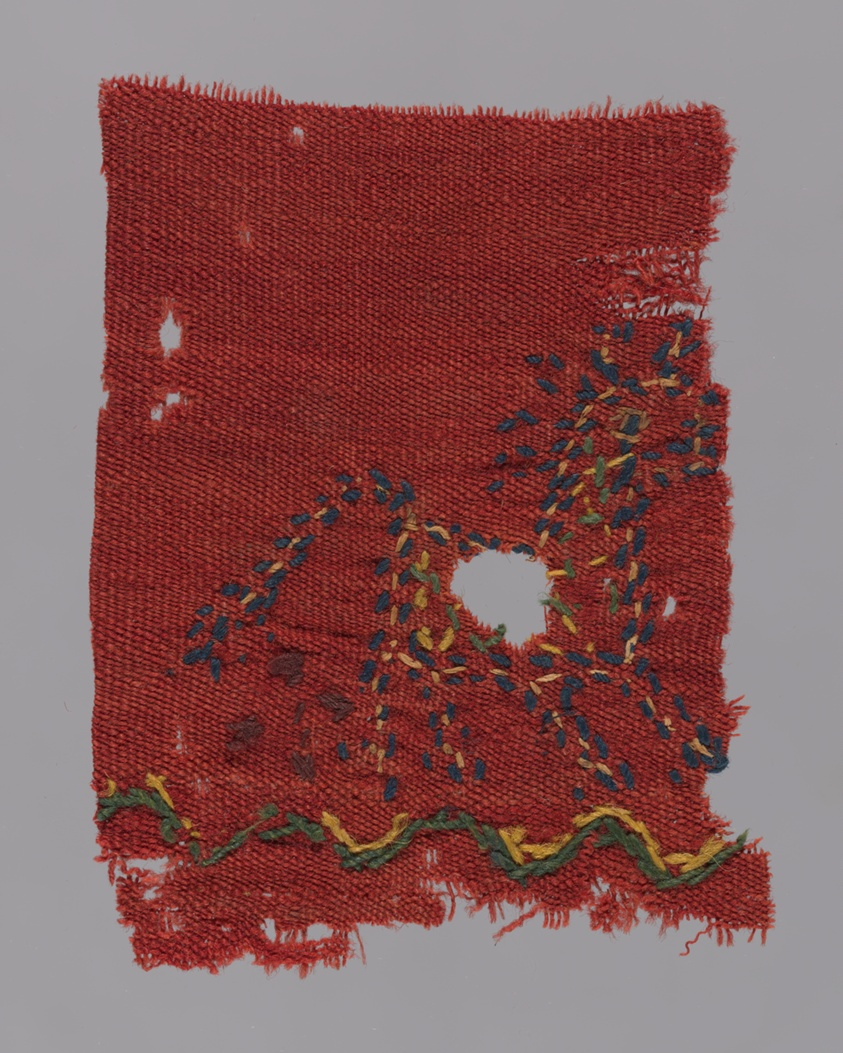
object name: Textile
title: Fragment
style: roman period (egyptian)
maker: Coptic (Egypt)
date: Roman period (30 B.C.– 641 A.D.)/Arab period (641–969), 6th/8th century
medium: Wool, tapestry weave; embroidered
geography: Egypt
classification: textile; needlework (visual works)